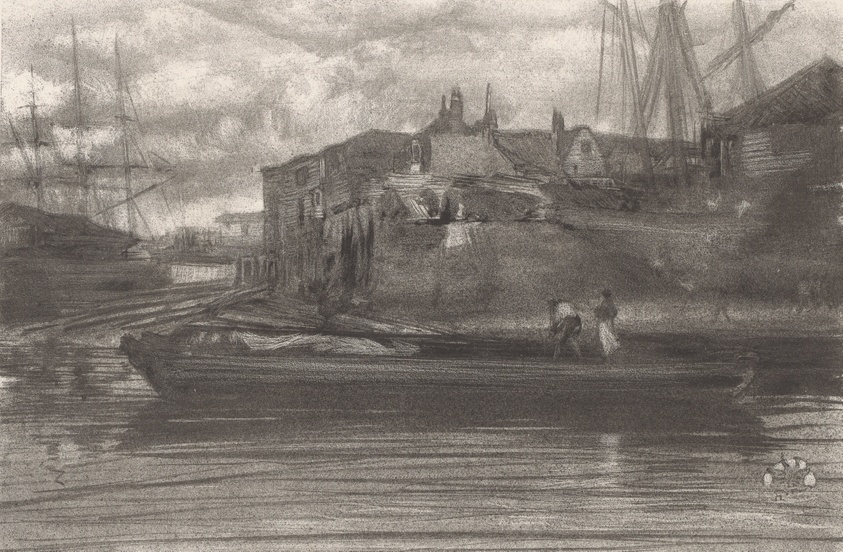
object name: Print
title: Limehouse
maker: James McNeill Whistler (American, 1834-1903)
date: 1878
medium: Lithotint in black ink with scraping and incising, on a prepared half-tint ground, on off-white plate paper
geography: United States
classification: lithotint; lithograph; print; prints and drawing; paper